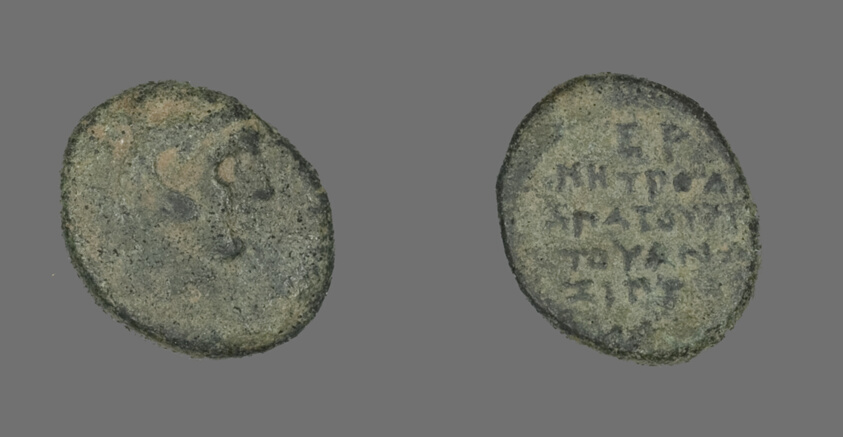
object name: Coin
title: Coin Depicting the Hero Herakles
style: greek, ancient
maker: Greek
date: about 300-200 BCE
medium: Bronze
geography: Ancient Greece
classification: coin; ancient art